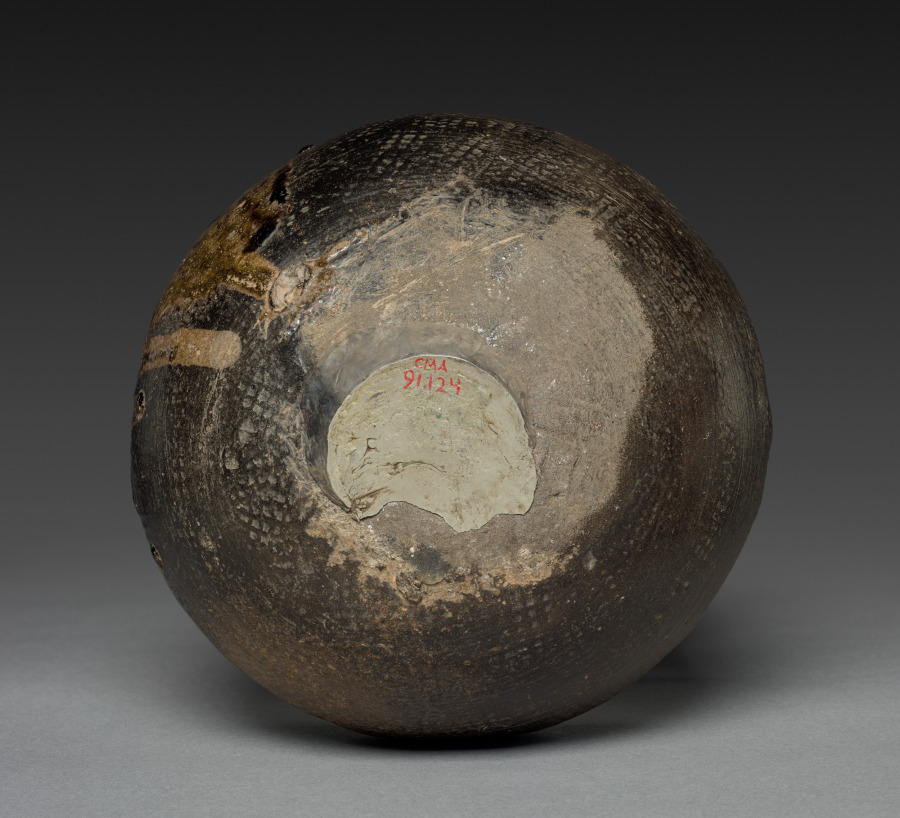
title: Jar with Combed Design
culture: Japan, Kofun period (300–710 CE)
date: 400s–500s CE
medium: stoneware with natural ash glaze, impressed and tooled patterns (Sue ware)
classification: Ceramic